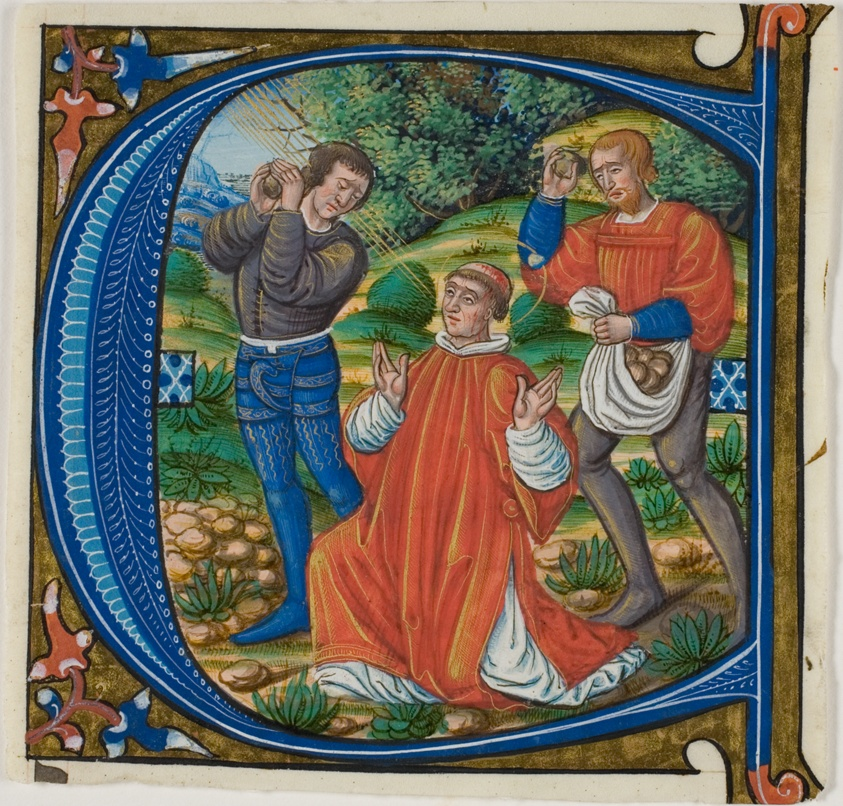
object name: Drawing and Watercolor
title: The Stoning of Saint Stephen in a Historiated Initial "A" or "C" from a Gradual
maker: French (Paris); circle of the Master of Jacques de Besançon or the Master of Morgan 85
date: c. 1500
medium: Manuscript cutting in tempera and gold leaf, with gothica textualis inscriptions in black, ruled in red, on parchment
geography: France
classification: tempera; drawings (visual works); prints and drawing